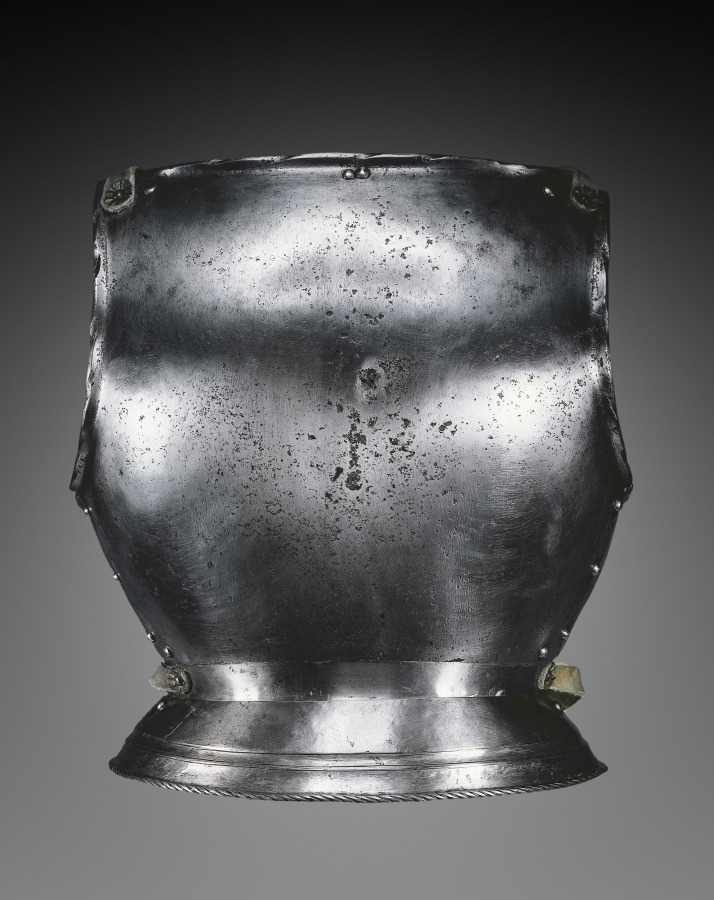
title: Backplate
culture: Germany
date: c.1510–30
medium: steel with black paint, leather straps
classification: Arms and Armor